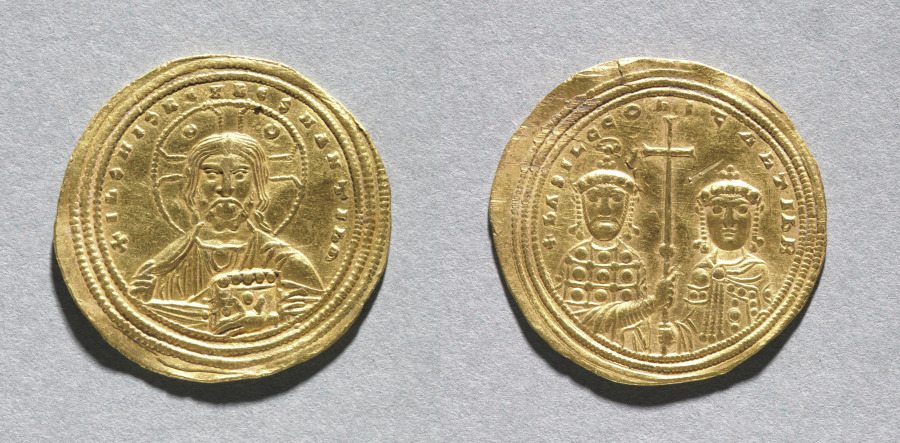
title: Nomisma with Basil II Bulgarotonos and His Brother Constantine VIII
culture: Byzantium, Constantinople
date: 977–1025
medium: gold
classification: Coins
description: The vast number of surviving Byzantine coins attests to the level of trade across the empire. Controlled and supervised by the emperor, the producers of coins took care to represent his authority and reflect his stature. Talented artists were recruited to engrave the dies (molds) used for the striking of coins. Emperors increasingly came to include their heirs and co-emperors on their coinage, as well as other family members or even earlier rulers. Coins were recognized, then as now, as small, portable works of art. With their inscriptions and images, Byzantine coins provide valuable documentation of historical events and a record of the physical appearance of the emperors. The coins shown here include the solidus, the basic gold coin of 24 karats; the tremissis, a gold coin of one-third the weight and value of the solidus; and the nomisma, which in the 10th century replaced the solidus as the standard gold coin.